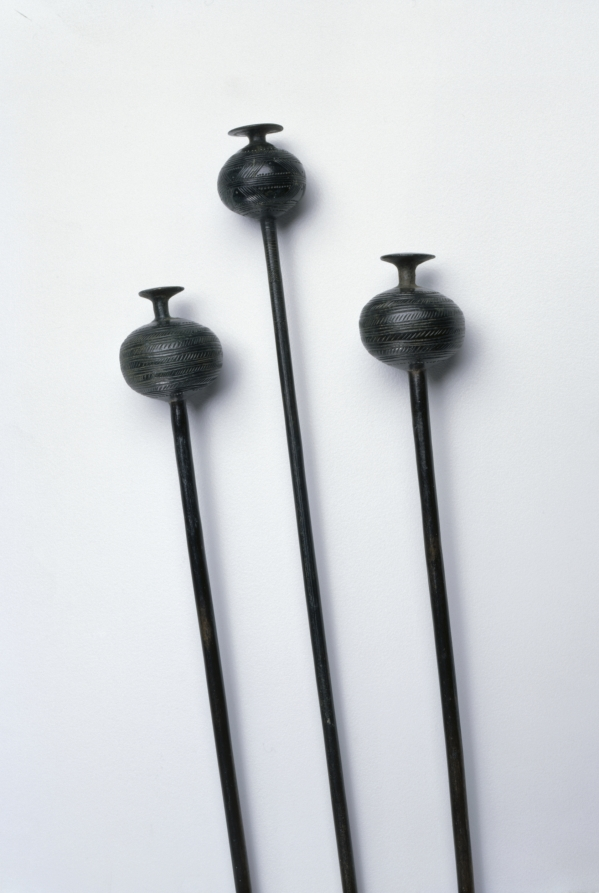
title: Garment Pin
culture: possibly Hungary, Bronze Age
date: c. 1400 BCE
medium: cast and wrought bronze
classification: Jewelry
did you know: This metal pin was used to fasten clothing.